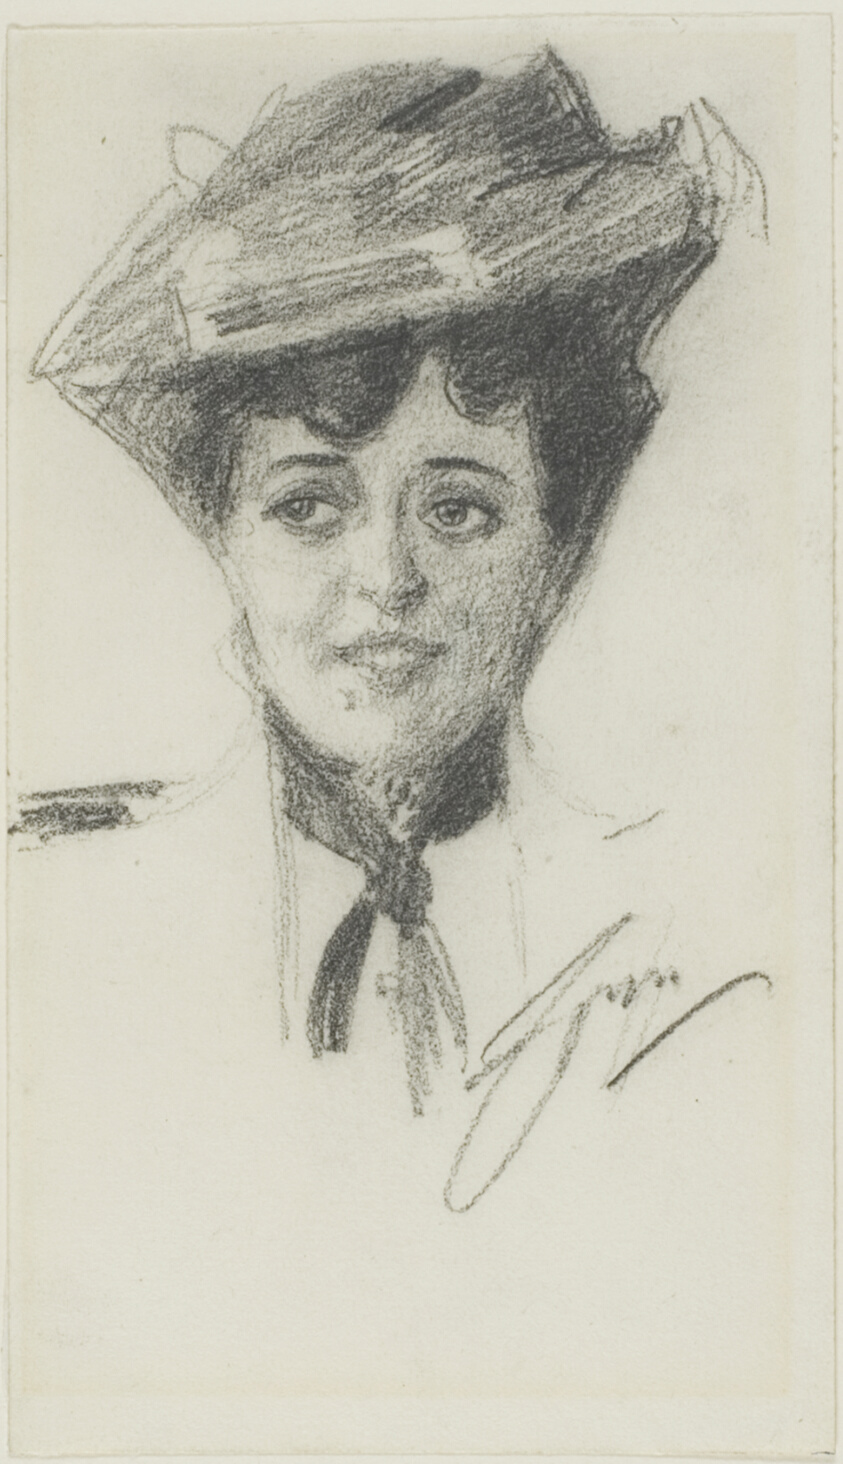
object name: Drawing and Watercolor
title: Head of a Young Woman Wearing a Hat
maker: Anders Zorn (Swedish, 1860-1920)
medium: Graphite on ivory wove paper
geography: Sweden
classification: graphite; drawings (visual works); prints and drawing